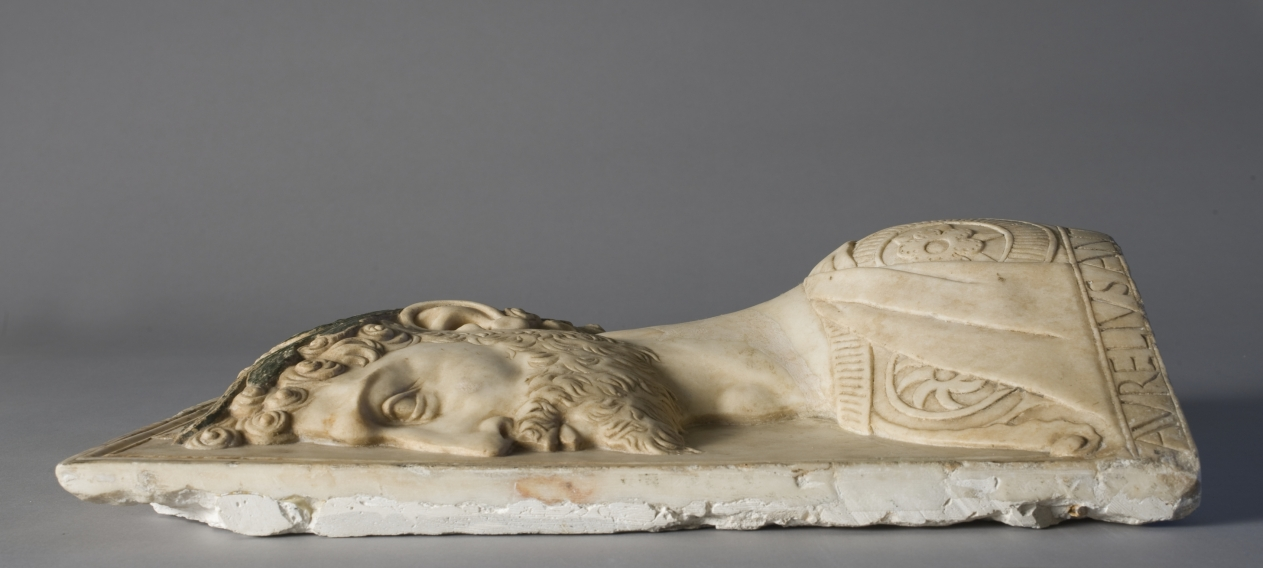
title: Aurelius Antoninus Pius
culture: Italy, Lombard School, late 15th century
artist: Gregorio di Lorenzo (Italian, c. 1436–1504)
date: late 1400s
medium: marble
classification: Sculpture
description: A laurel wreath rests on this Roman emperor’s finely articulated corkscrew curls, underscoring his military triumphs. While many ancient and classically inspired marble sculptures were painted, the survival of pigments is rare. In addition to the vibrant green coloring, traces of gold also remain on the leaves.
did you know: The artist can be identified by his distinctive flame-shaped curls forming the beard.